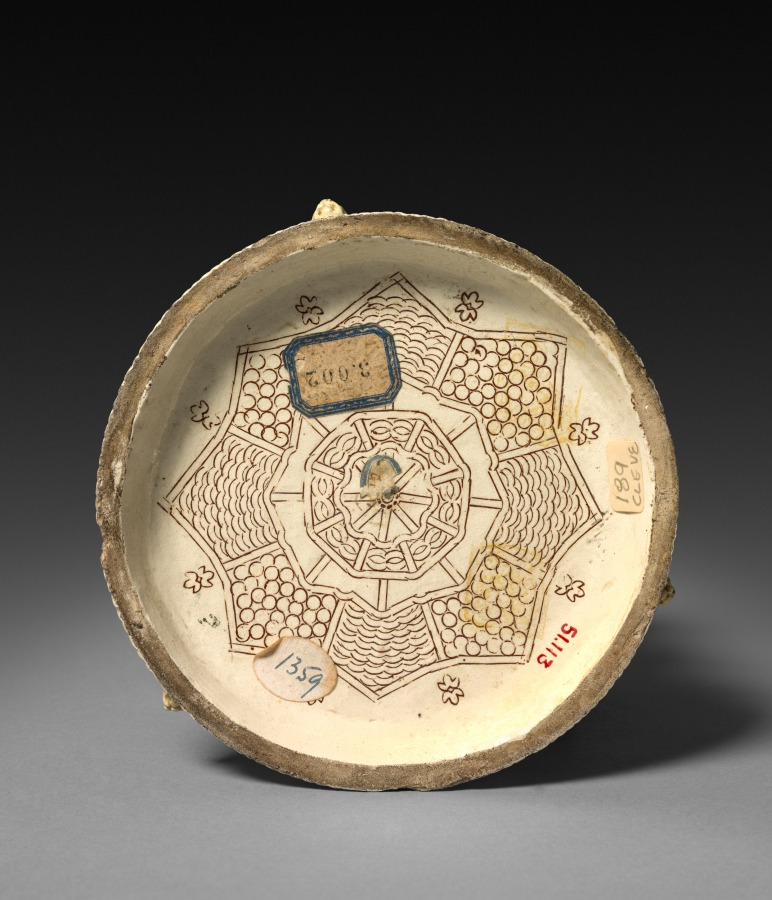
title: Salt Cellar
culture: France, 19th century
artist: after Saint-Porchaire (French)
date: 1800s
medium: white earthenware with inlaid decoration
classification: Ceramic